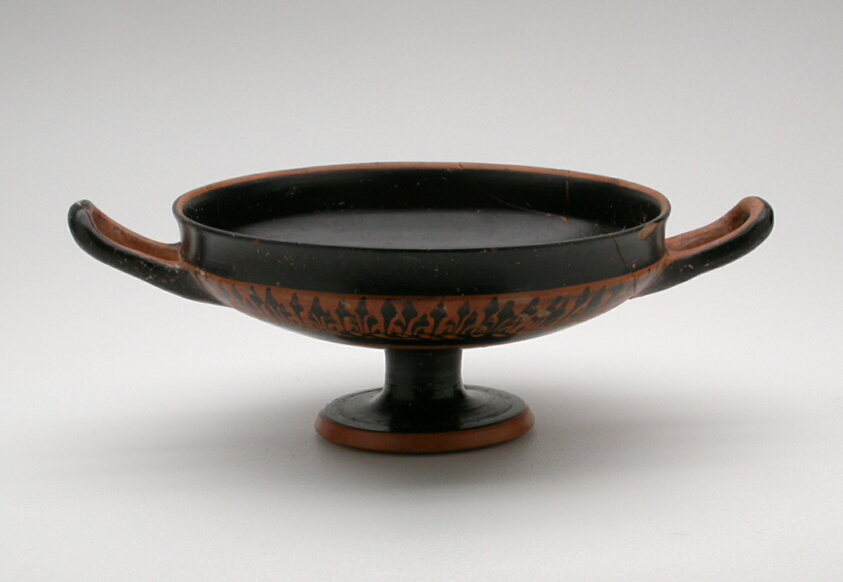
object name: Vessel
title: Kylix (Drinking Cup)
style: greek, attic, black-figure, ancient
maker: Greek; Athens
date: 520-500 BCE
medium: terracotta, black-figure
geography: Athens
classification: drinking vessel; ceramics; vessel; ancient art